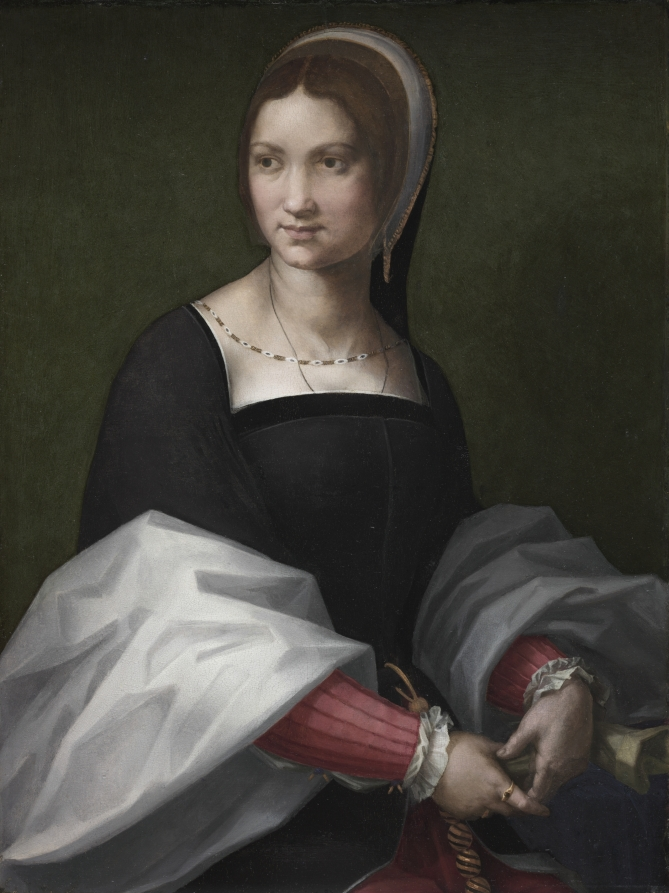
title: Portrait of a Woman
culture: Italy, 16th century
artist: circle of Andrea del Sarto (Italian, 1486–1530)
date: c. 1518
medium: oil on wood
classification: Painting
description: King Francis I’s deep interest in Italian Renaissance culture manifested itself not only through acquiring important works of art but also by bringing leading architects, scholars, and artists to Paris. Chief among these figures was the Florentine painter Andrea del Sarto. The sitter’s distinctively French hood and black veil suggest that someone talented closely connected to the artist painted this work during his brief time in France.